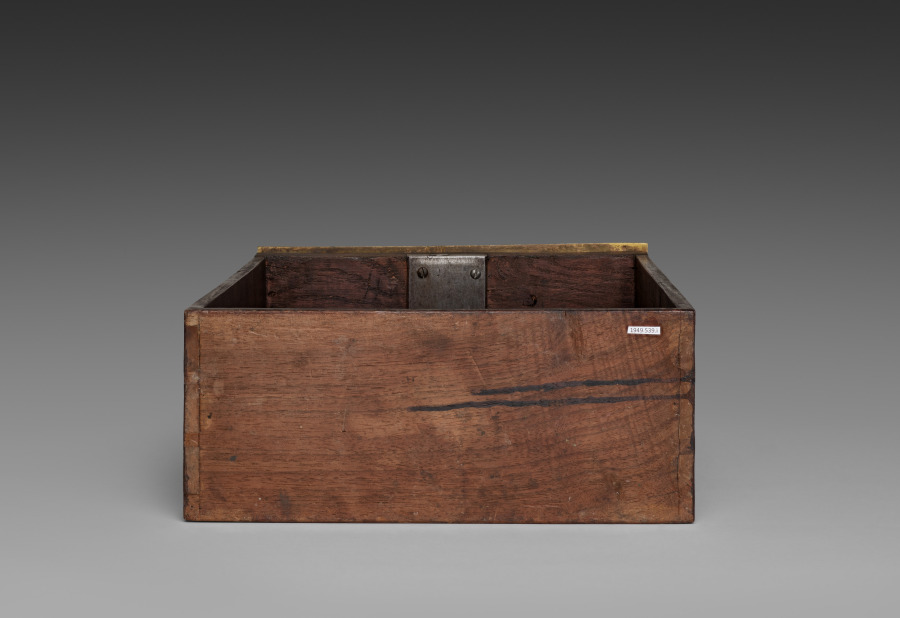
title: Side Drawer for Cabinet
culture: France, late 17th Century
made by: André-Charles Boulle (French, 1642–1732)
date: c. 1690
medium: ebony, marquetry in metal and tortoise shell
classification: Furniture and woodwork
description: Appointed cabinetmaker to King Louis XIV in 1672, André-Charles Boulle became a master of furniture making in France during the late 1600s until his death in 1732. Known primarily for his use of marquetry, in which metal patterns are inlaid into tortoiseshell then applied within the veneered surface of the furniture, Boulle established a level of quality and craftsmanship few others could achieve. As a result, his work found favor at the royal court and among other aristocrats and diplomats eager to impress the king. The inclusion of a medallion depicting Louis XIV within the bronze decoration of this chest would have identified the owner with the royal court. Often exhibiting stout architectural proportions with elegant groups of inlaid motifs such as the parrot on the central panel of this chest, Boulle’s designs are an example of the intellectual fashion for contrasting ideas, materials, and motifs.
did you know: Originally designed to sit atop an elaborate tall stand, this chest was likely altered in the late 1700s to reduce its scale and height.